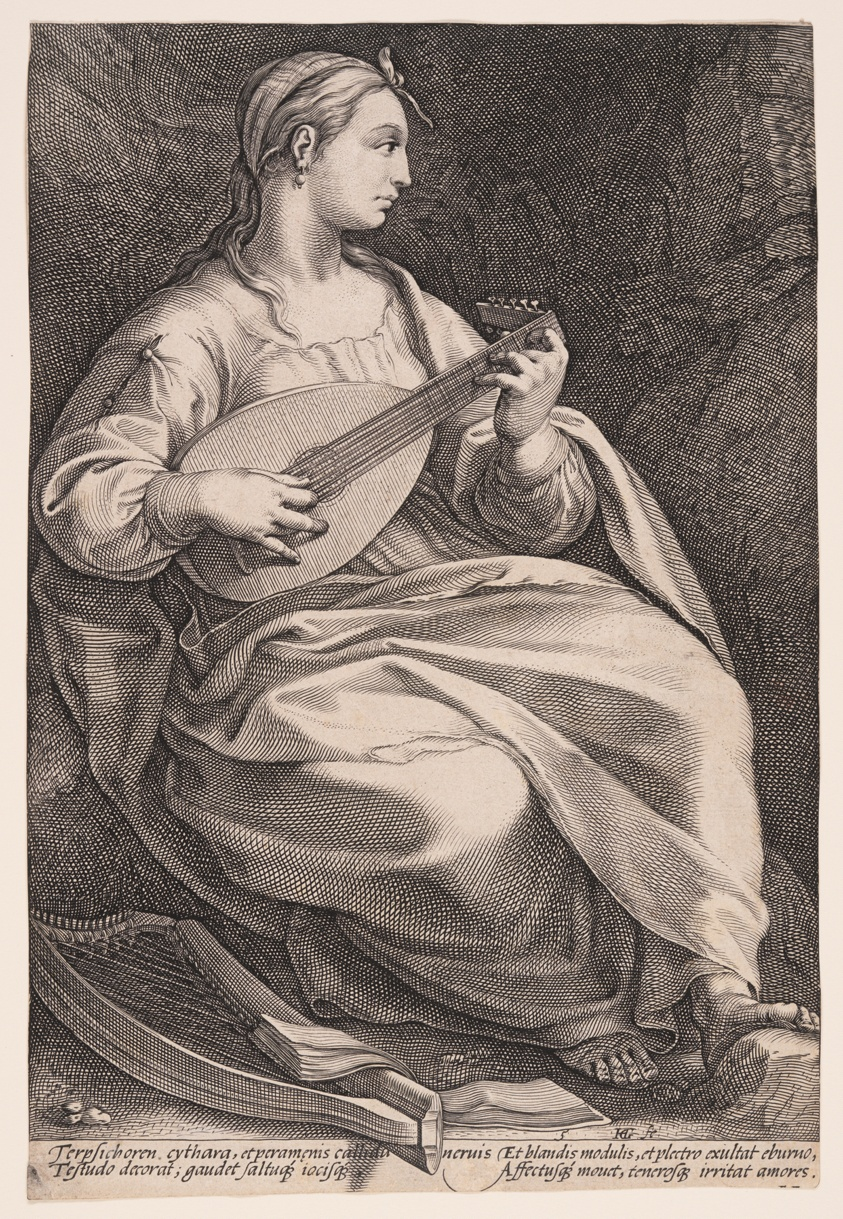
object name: Print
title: Terpsichore, The Muse of Dance, from The Nine Muses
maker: Hendrick Goltzius (Dutch, 1558–1617)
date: 1592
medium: Engraving on laid paper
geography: Netherlands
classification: print; engraving; paper; prints and drawing